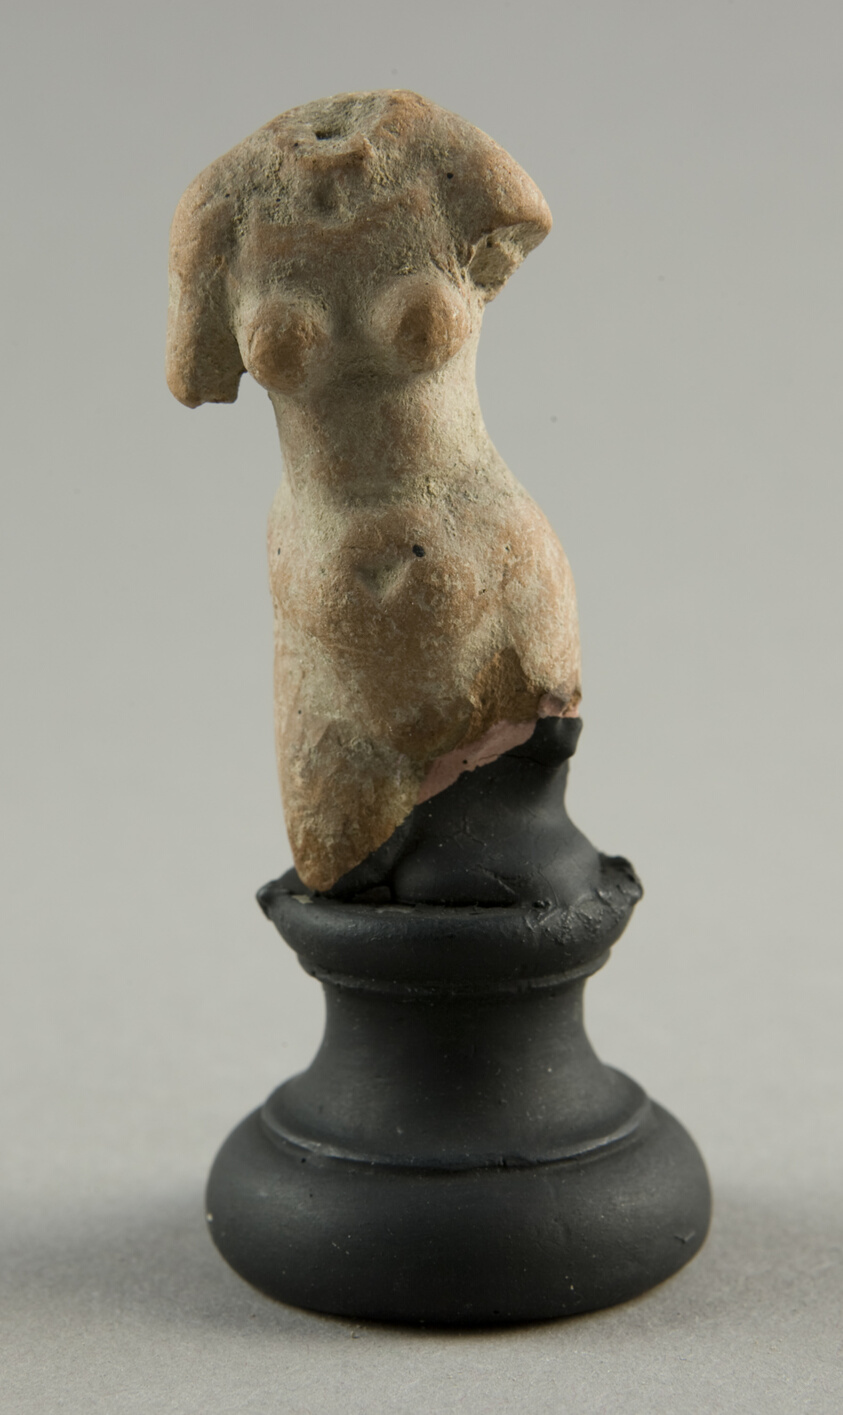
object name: Sculpture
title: Torso of a Nude Woman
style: greek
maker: Greek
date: 3rd-2nd century BCE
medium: terracotta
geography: Greece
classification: earthenware; ceramics; sculpture; ancient art